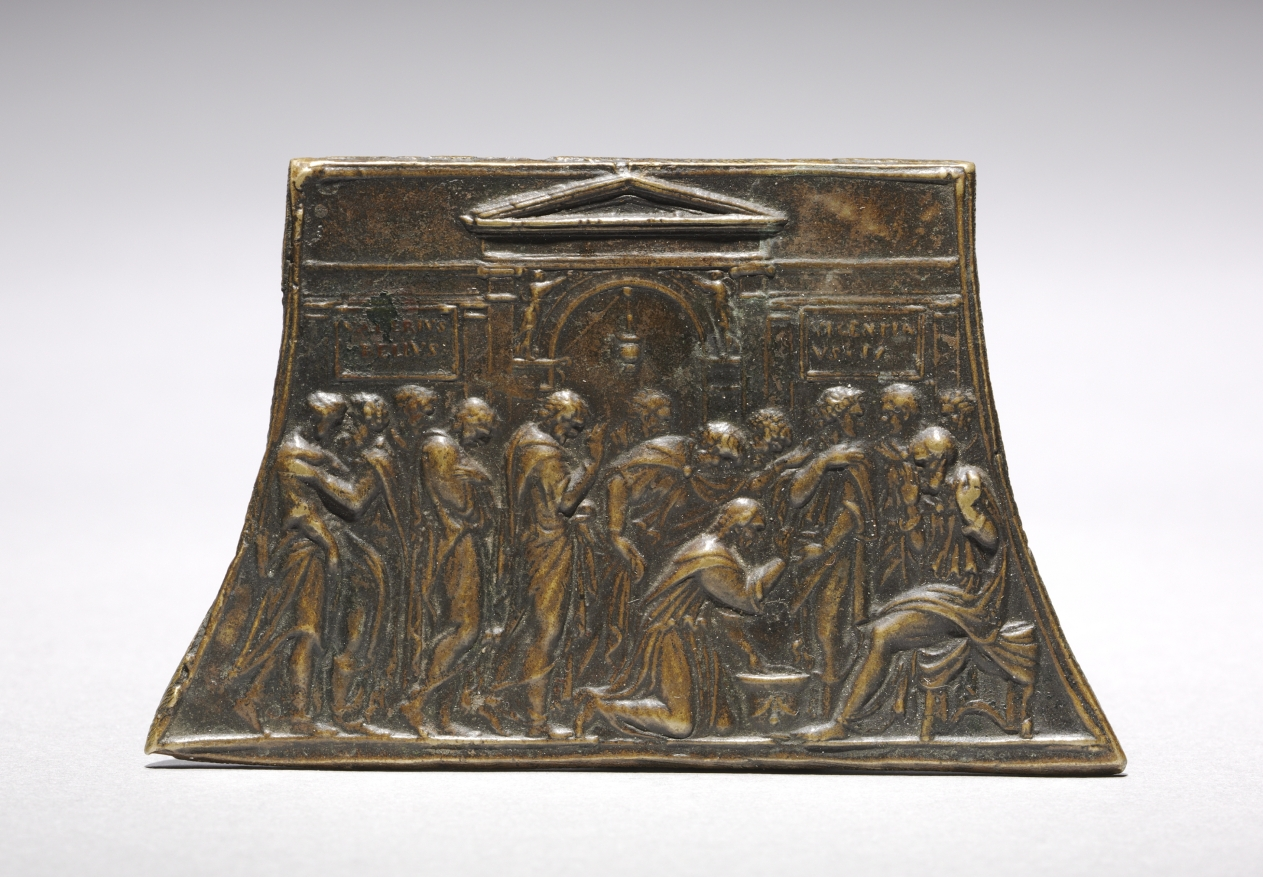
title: Christ Washing the Feet of the Apostles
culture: Italy, 16th century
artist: Valerio Belli (Italian, c. 1468–1546)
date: 1500s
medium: bronze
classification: Sculpture